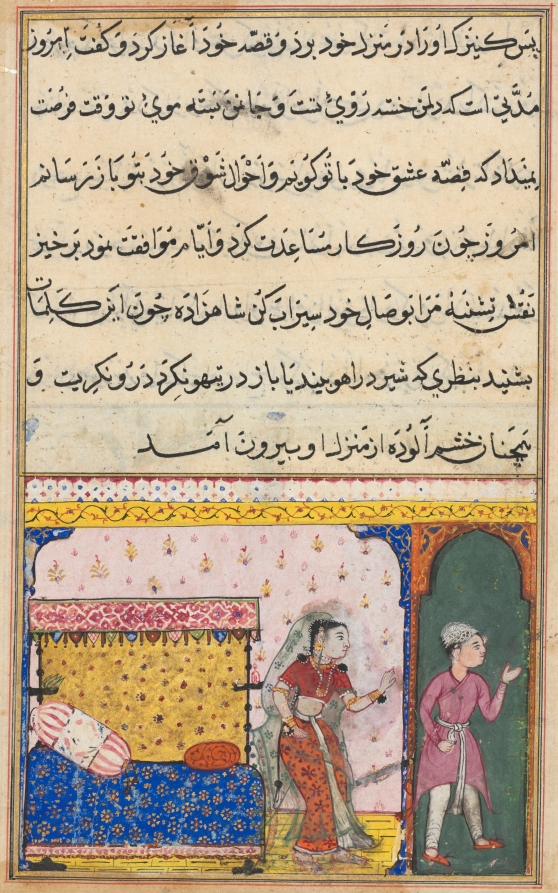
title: The prince rejects the amorous advances of the king’s handmaiden, from a Tuti-nama (Tales of a Parrot): Eighth Night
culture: Mughal India, court of Akbar (reigned 1556–1605)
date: c. 1560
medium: gum tempera, ink, and gold on paper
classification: Painting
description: Once the handmaiden got the prince to her rooms, she suggested they have an affair and professed her secret feelings for him. He rebuffed her in silence and departed, disgusted. Insulted and afraid of what the prince might tell the king, she accused the prince of having attempted to rape her. The king then sentenced the prince to death. The handmaiden wears an Indian sari, consisting of an orange printed wrapped skirt secured with a sash, a short red blouse, and a long diaphanous scarf worn over her head. The prince is dressed in the Central Asian tunic and pants customarily worn by the Mughals.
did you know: The prince is only thirteen-years-old in the story.